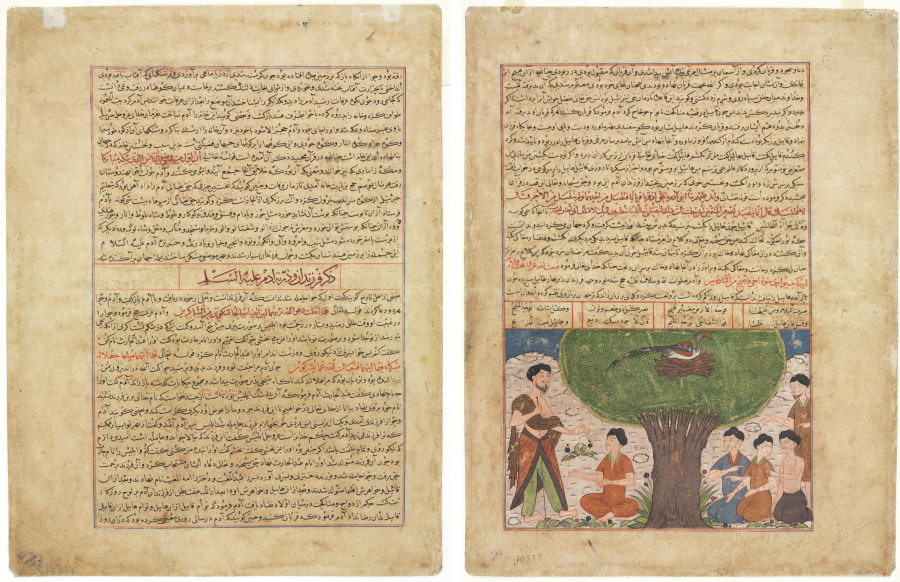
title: Text Page, Persian Prose (recto); The Story of Adam peace upon him, his Sons and Progeny (verso)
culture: Afghanistan, Herat, Timurid period (1370–1501)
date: c. 1425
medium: ink and opaque watercolor on paper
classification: Manuscript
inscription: script: Naskh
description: These two pages are from a manuscript that evidently was written and illustrated for the library (at Herat) of the Timurid king Shah Rukh, the son of Timur (Tamerlane). The Majma' al-Tawarikh traced the history of the world, beginning with the prophets of the Old Testament until the reign of Shah Rukh.